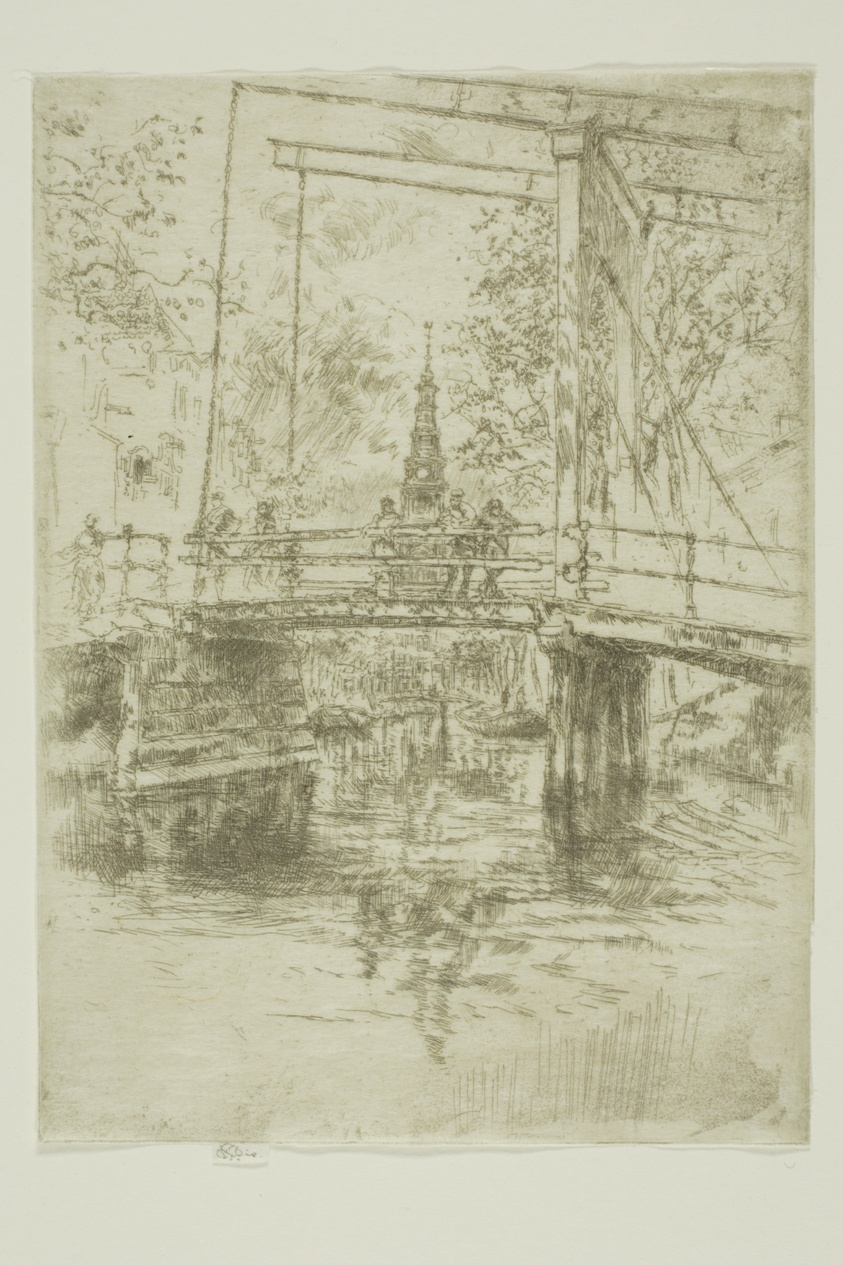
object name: Print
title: Little Drawbridge, Amsterdam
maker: James McNeill Whistler (American, 1834-1903)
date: 1889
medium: Etching with foul biting in dark brown ink on ivory Japanese paper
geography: United States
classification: etching; foul biting; print; prints and drawing; paper